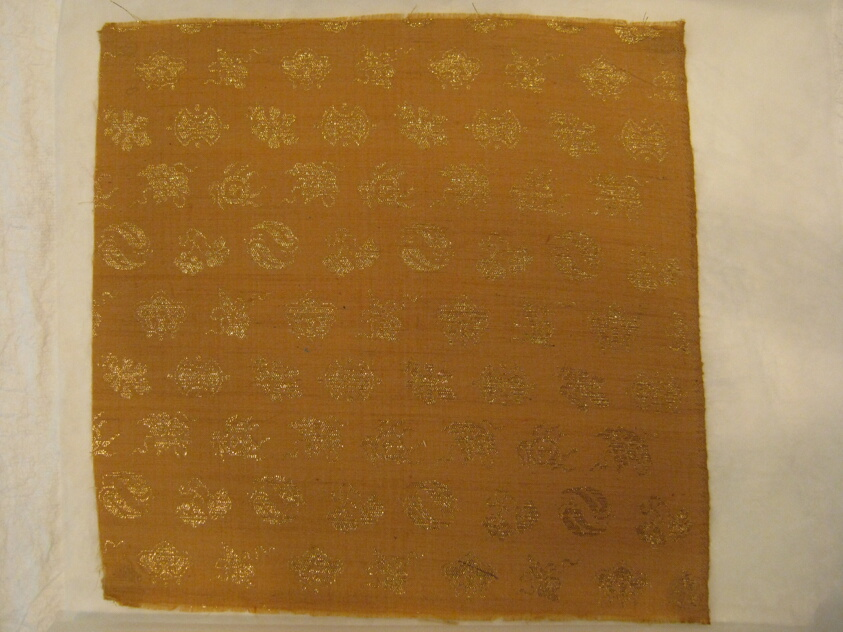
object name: Textile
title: Fragment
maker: Japan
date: late Edo period (1789–1868)/ Meiji period (1868–1912), 19th century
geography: Japan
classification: textile; weaving